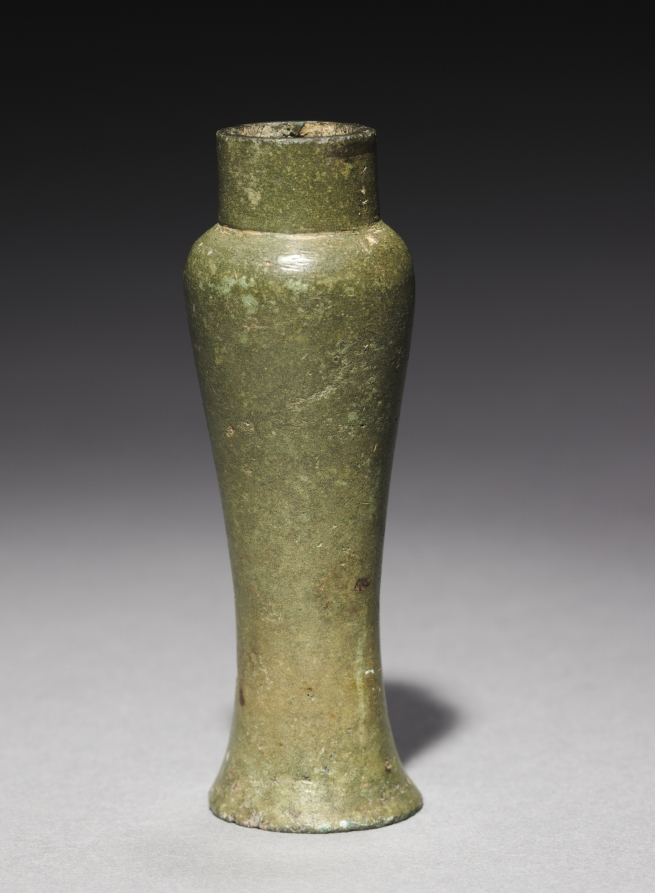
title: Vase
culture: Korea, Goryeo dynasty (918–1392)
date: 918–1392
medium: bronze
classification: Metalwork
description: Various objects such as this miniature metal vessel were the most common burial objects in tombs during the Goryeo period (918–1392). Furnishing tombs with an elaborate assemblage of objects was believed to honor and comfort the newly dead.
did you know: This miniature bronze vase may have been made exclusively as a tomb object.